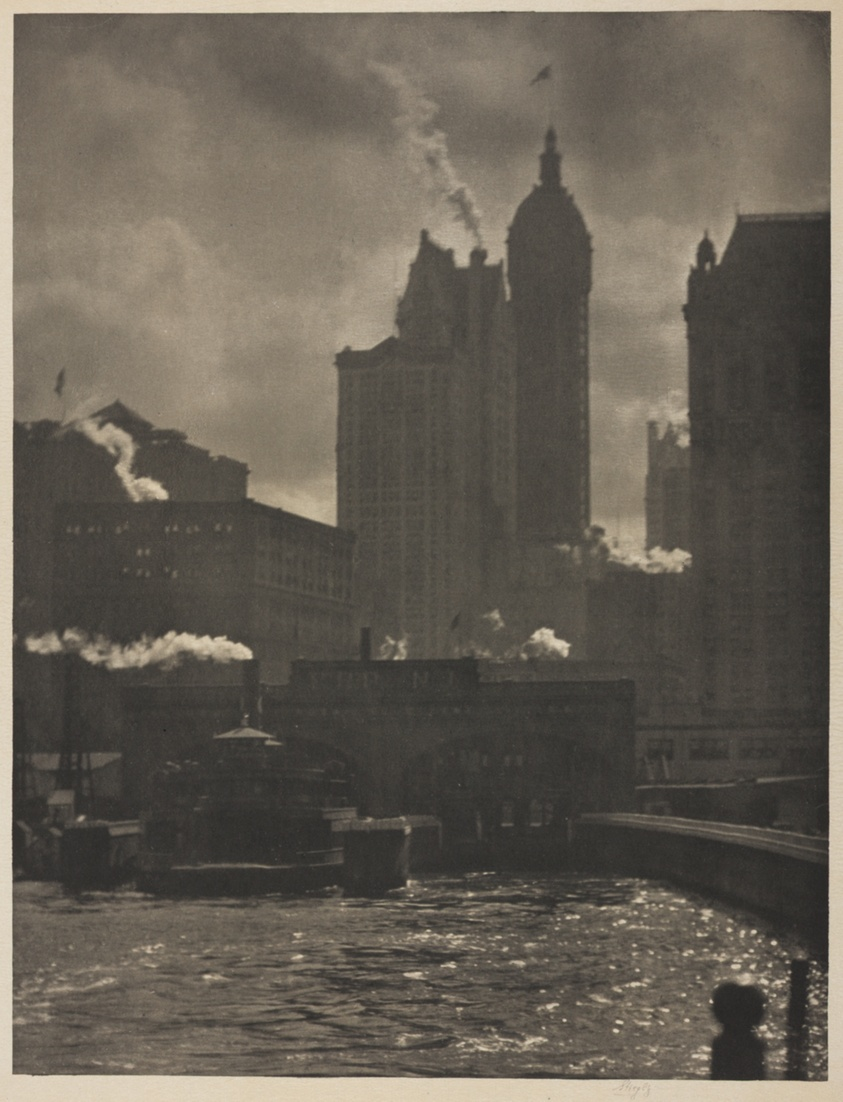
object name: Photograph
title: The City of Ambitions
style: Pictorialism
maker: Alfred Stieglitz (American, 1864–1946)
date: 1910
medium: Photogravure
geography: United States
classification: photogravure; photomechanical process; photography; photograph